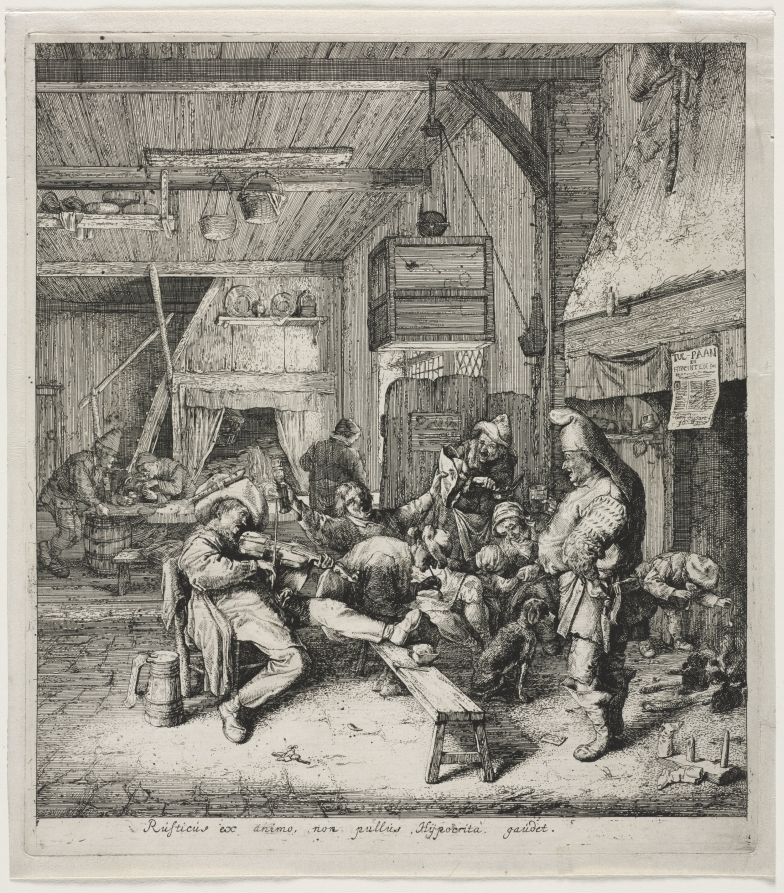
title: Violin Player Seated in the Inn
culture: Netherlands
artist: Cornelis Dusart (Dutch, 1660–1704)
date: 1685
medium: etching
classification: Print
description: This tavern scene has all the elements of a good time: music, merrymakers, and abundant alcohol. The seated man with raised arms holds a pole glass, meant for passing around among drinkers. A standing figure on the right draws our eye. Dressed in an elegant waistcoat, drink in hand, he observes with a note of amusement. His figure recalls Silenus, Bacchus’s teacher, who appears in numerous mythological scenes in this exhibition. Like Silenus, he encourages viewers to consider wine’s impact on those without self-control. The Latin verses describe the “rustics” depicted, drawing a comparison between their behavior and the viewer, who was assumed to be of a higher social class.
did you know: The broadsheet above the hearth is titled "Tulips and Hyacinths" in Dutch. The cultivation and export of these flowers was an important part of the Dutch economy in the 1600s.